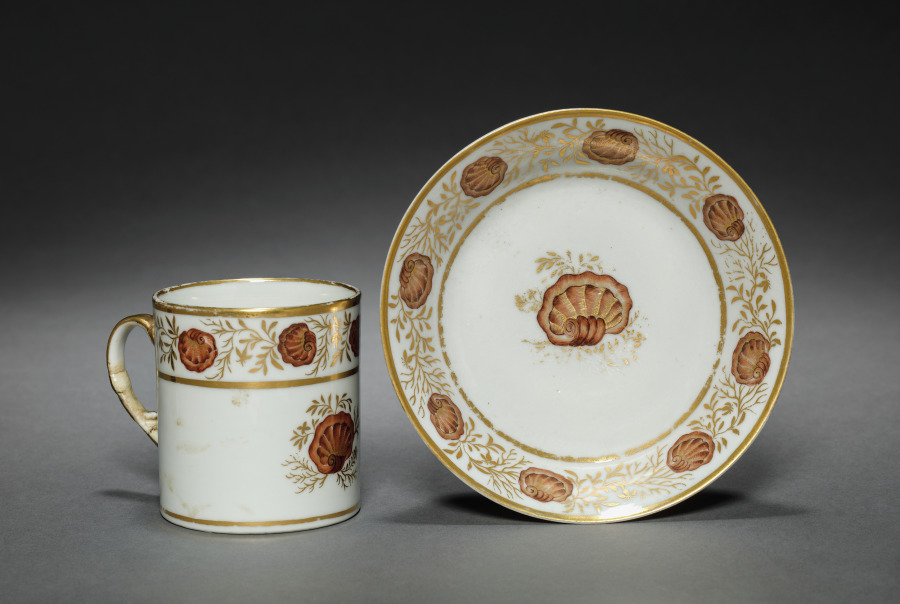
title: Cup and Saucer from Oliver Wolcott, Jr. Tea Service (6 of 6)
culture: Chinese Export porcelain, late 18th-early 19th century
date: 1785–1805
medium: porcelain, sepia enamel, gold leaf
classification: Ceramic